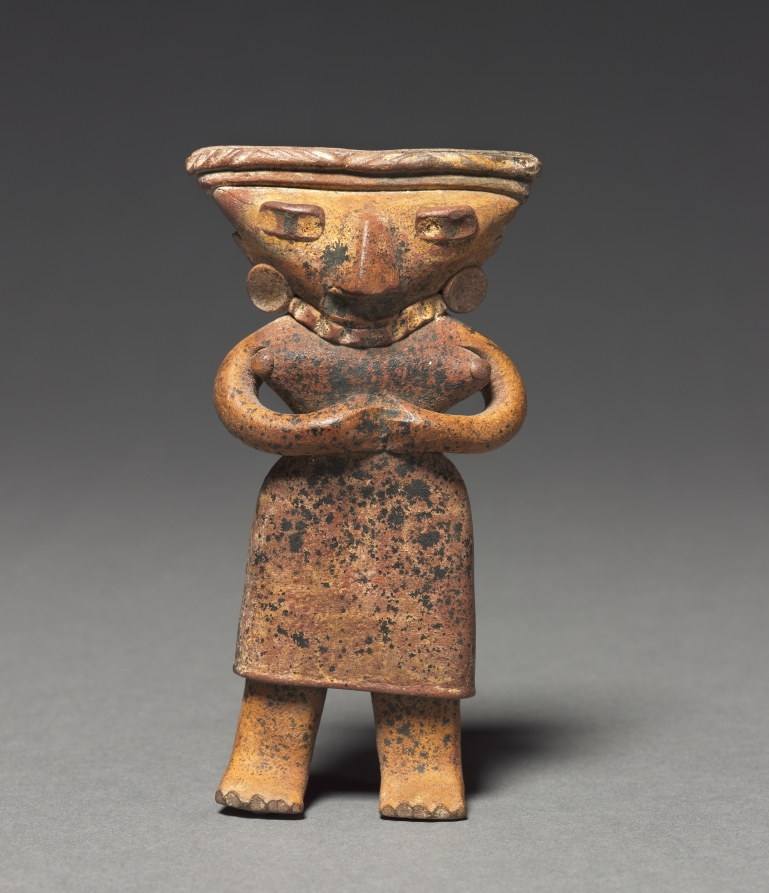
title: Female Figurine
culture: Mexico, Michoacán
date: 100 BCE–300 CE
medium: earthenware with pigment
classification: Sculpture